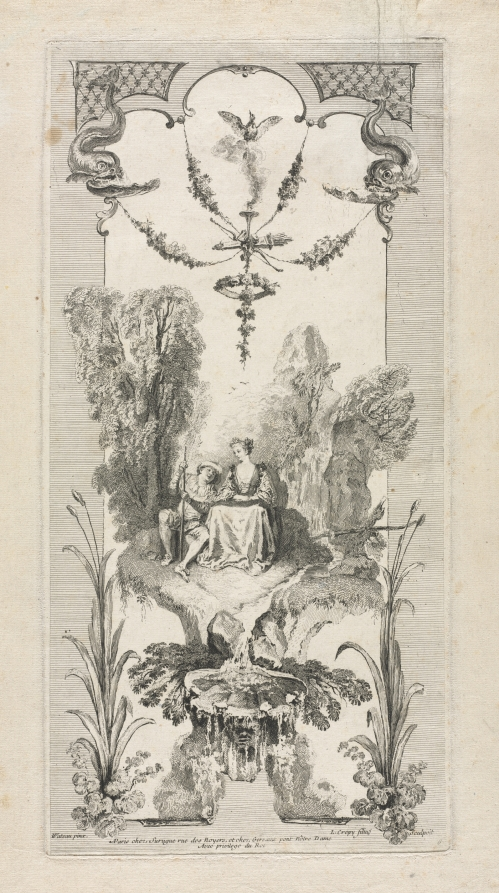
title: Pastoral, Arabesque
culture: France, 18th century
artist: Louis Crépy (French)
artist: after Jean-Antoine Watteau (French, 1684–1721)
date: early 1700s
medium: engraving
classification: Print